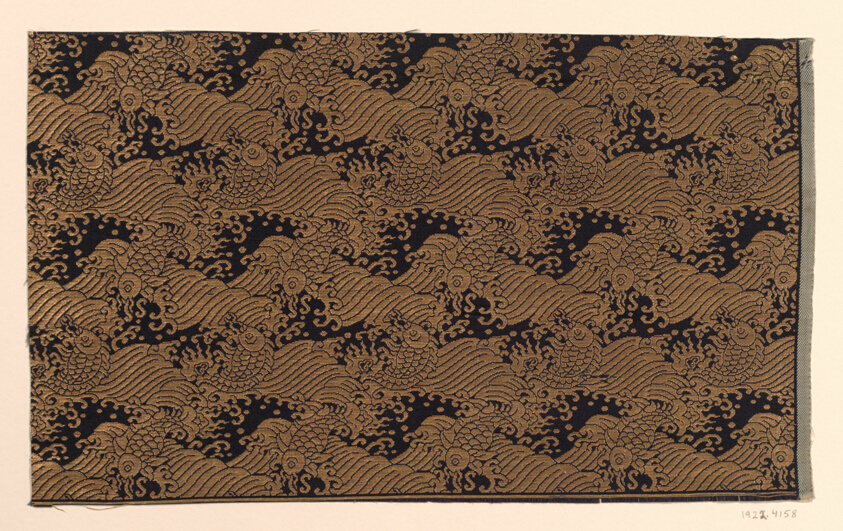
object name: Textile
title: Fragment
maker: Japan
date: Edo period (1615–1868), 1775/1825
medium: Compound twill, silk, and gilt paper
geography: Japan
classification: textile; weaving